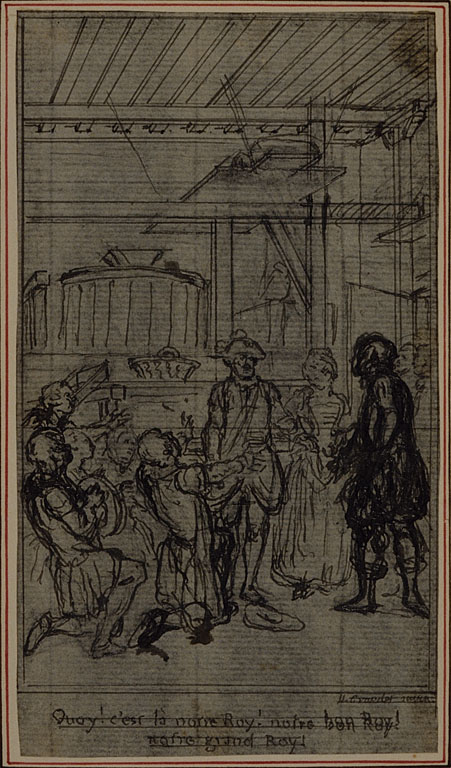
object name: Drawing and Watercolor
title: Study for Vignette-Frontispiece of Colle's "La Partie de Chasse de Henri IV", Act III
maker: Hubert François Gravelot (French, 1699-1773)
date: c. 1766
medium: Pen and black ink, with traces of graphite, on gray laid paper, incised for transfer and perimeter mounted on cream laid paper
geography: France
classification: pen and ink drawings; drawings (visual works); prints and drawing